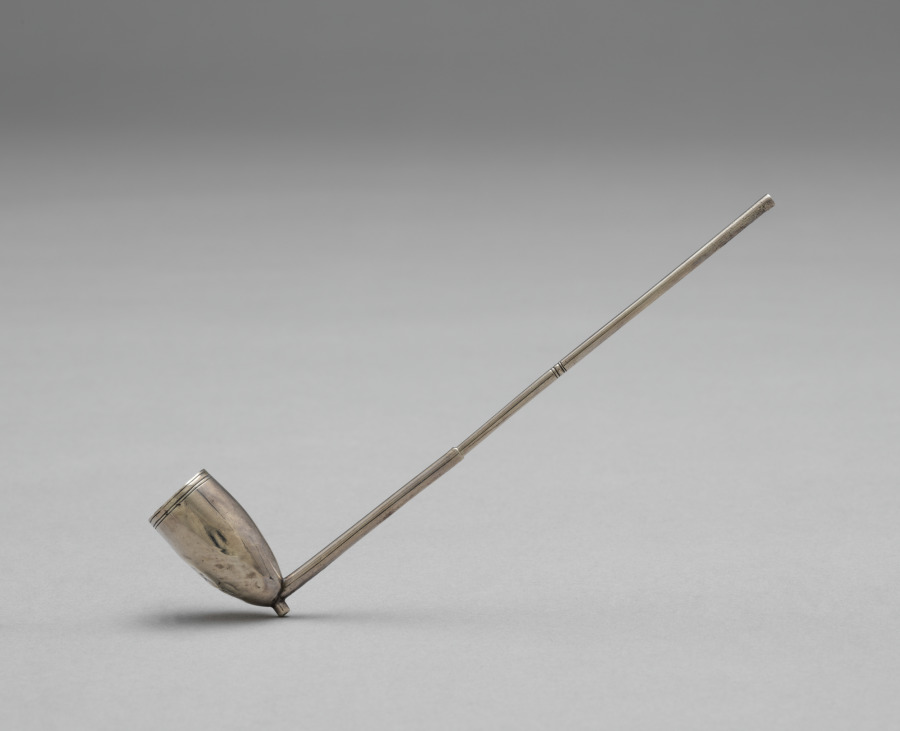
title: Pipe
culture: America, late 18th - early 19th century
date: late 1700s - early 1800s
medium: silver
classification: Silver